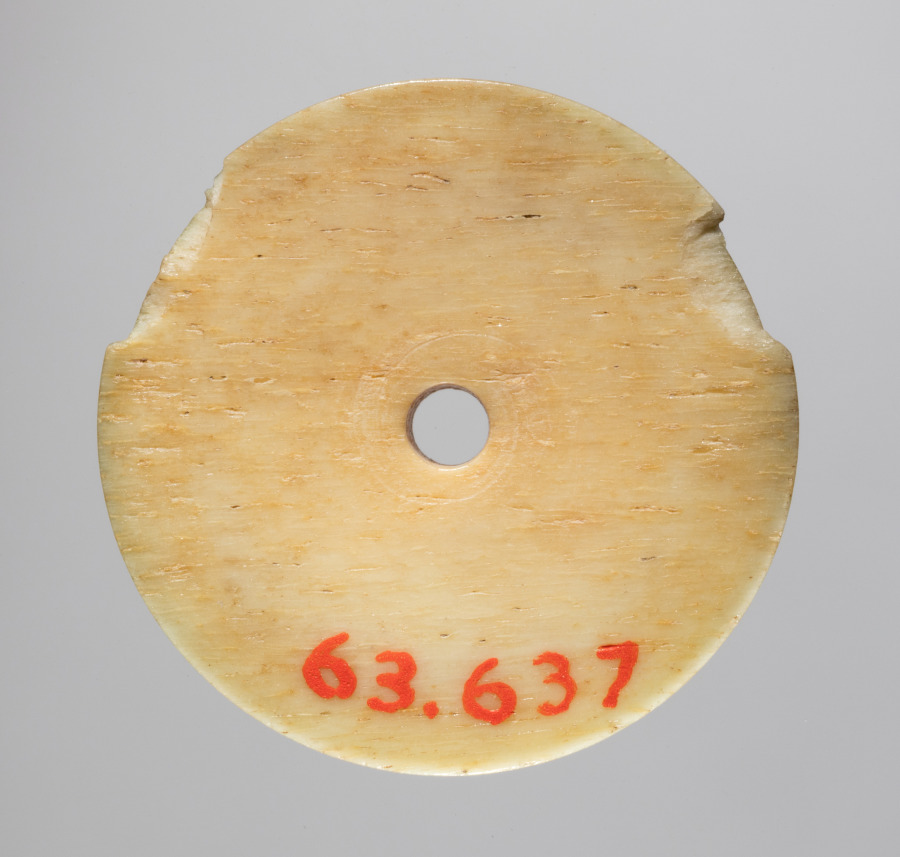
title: Spindle Whorl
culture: Iran, early Islamic period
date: 700s - 900s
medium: bone, incised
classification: Spindle Whorl